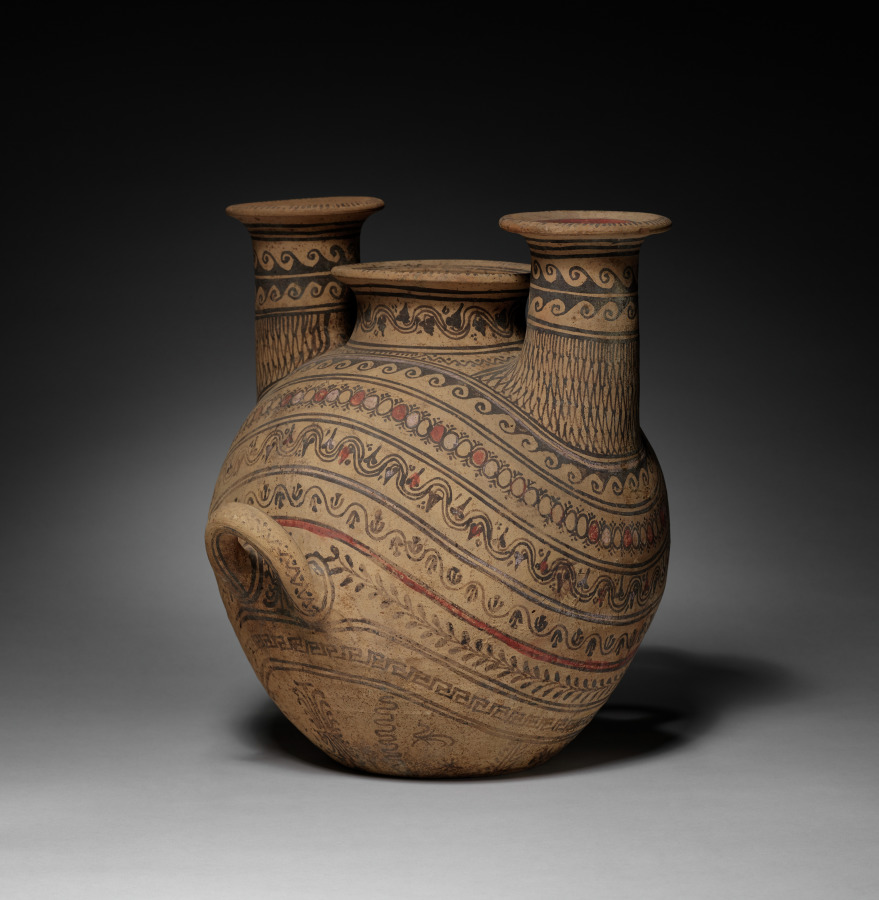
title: Two-Spouted Strainer Askos (Flask)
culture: South Italian, Daunian or Canosan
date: 300–200 BCE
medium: ceramic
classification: Ceramic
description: Although now referred to by the Greek term askos, because of its resemblance to the animal skins used to hold wine in ancient Greece, this ceramic shape developed in the South Italian region of Daunia (north of Apulia, on the Adriatic coast). This example is unusual for its three openings—one covered by a lid, the others spouted with built-in strainers. Its profusely painted decoration, mostly geometric and vegetal patterns applied in black with added red and white, is arranged in bands that follow the contours of the vessel.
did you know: Each spout has a built-in strainer—one near the top, the other near the bottom.